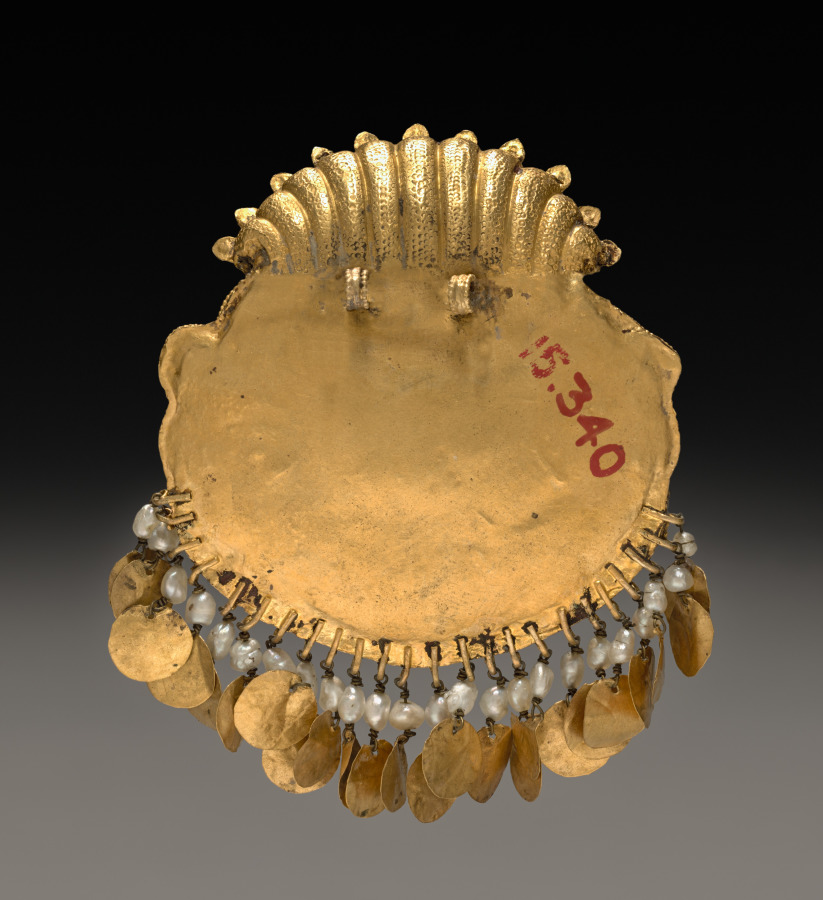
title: Pendant with Four-armed Green Vishnu on a lotus with Nagas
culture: Nepal, Kathmandu Valley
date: 1600s or 1700s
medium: Gold set with precious and semiprecious stones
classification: Jewelry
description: Vishnu, made of emeralds, holds his typical emblems, each made of gold: a discus in his upper right hand, the club in his upper left, and a lotus in his lower right hand. He sits cross-legged on a lotus pedestal made of spinels, nestled on the back of his mount, Garuda, shown with a crystal face, spinel torso, and turquoise wings. The intertwined bodies of nagas (serpent deities) form the bottom of this pendant; each naga holds a pearl in offering; their faces are carved from lapis lazuli. An eleven-headed serpent hood rears over the entire ensemble.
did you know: In Nepal and South India, the Hindu god Vishnu can be shown as either blue or green.